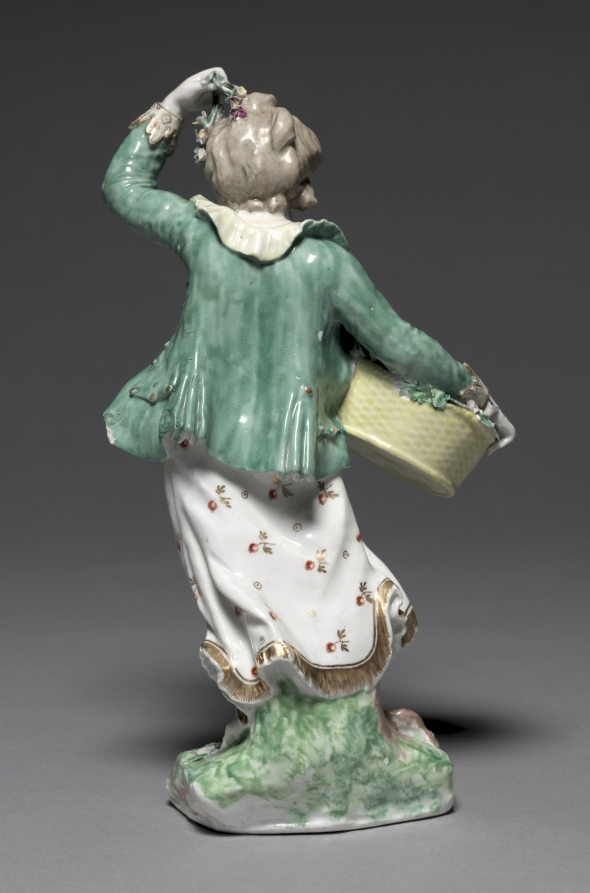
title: Figure of Spring from the Four Seasons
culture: England, Bristol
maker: Bristol Porcelain Factory (British, 1770–81)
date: c. 1775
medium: hard-paste porcelain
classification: Ceramic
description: The modern notion of childhood as a time of innocence and simplicity emerged during the second half of the eighteenth century. This understanding of adolescence led to numerous depictions of children as personifications of the four seasons. Here spring is portrayed as a young girl adorning her hair with flowers. The flowers filling her basket and growing in the grass around her signal spring’s arrival.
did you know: Allegorical figures most often decorated a table during the dessert course, providing amusing subjects for conversation.